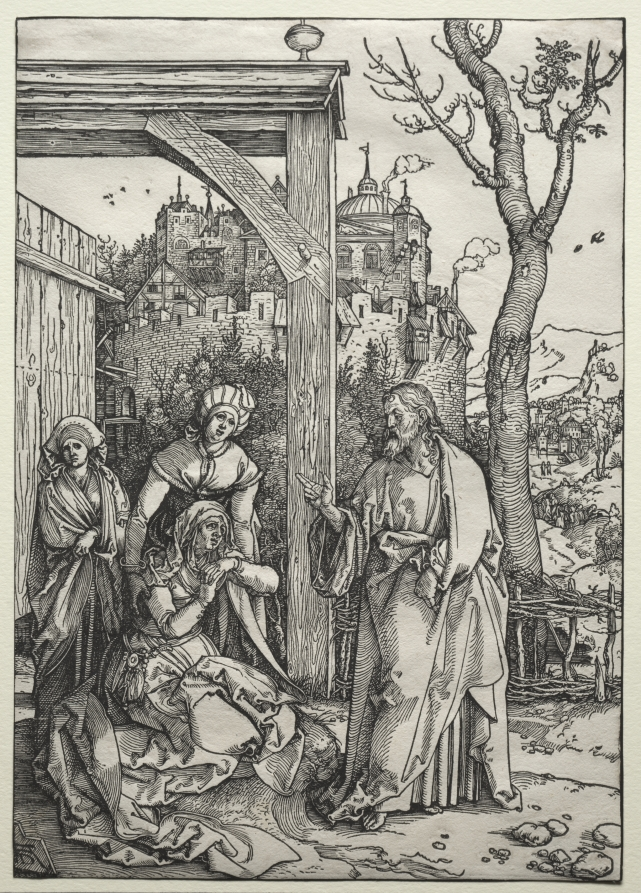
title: Christ Taking Leave of His Mother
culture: Germany, early 16th Century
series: The Life of the Virgin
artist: Albrecht Dürer (German, 1471–1528)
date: c. 1504–1505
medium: woodcut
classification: Print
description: These two woodcuts (1959.99.16-17) feature events that overlap in both Mary’s and Jesus’s lives. The first is a scene in which Mary finds Jesus, after days of searching, speaking from behind a lectern to the temple’s elders. The second refers to the the moment Mary was forced to say goodbye to her son as he leaves for Jerusalem and ultimately on to the events of his Passion. This print represents the most sorrowful episode of the series as Mary kneels, beseeching Jesus to stay.